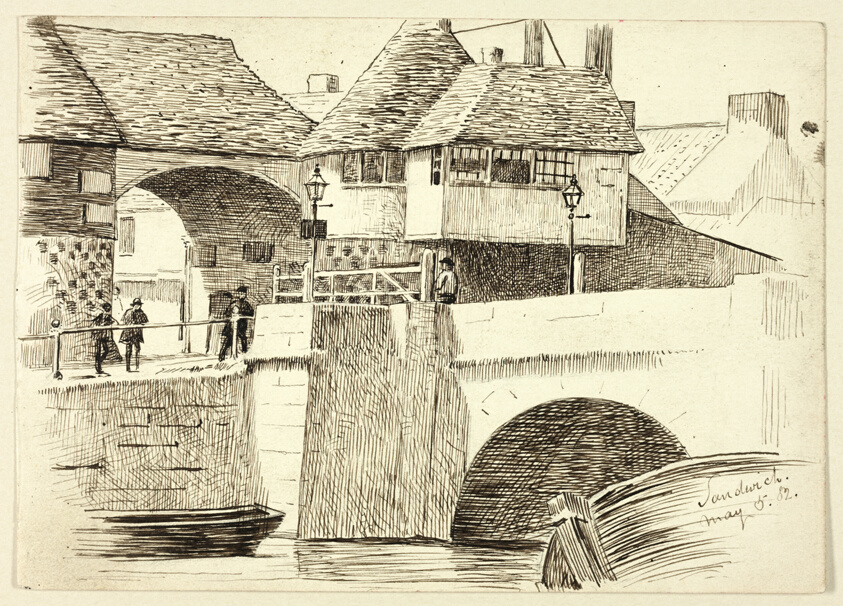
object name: Drawing and Watercolor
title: Sandwich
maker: Henry Stacy Marks (English, 1829-1898)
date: May 5, 1882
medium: Pen and brown ink, over traces of graphite, on cream wove paper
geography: England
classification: pen and ink drawings; drawings (visual works); prints and drawing